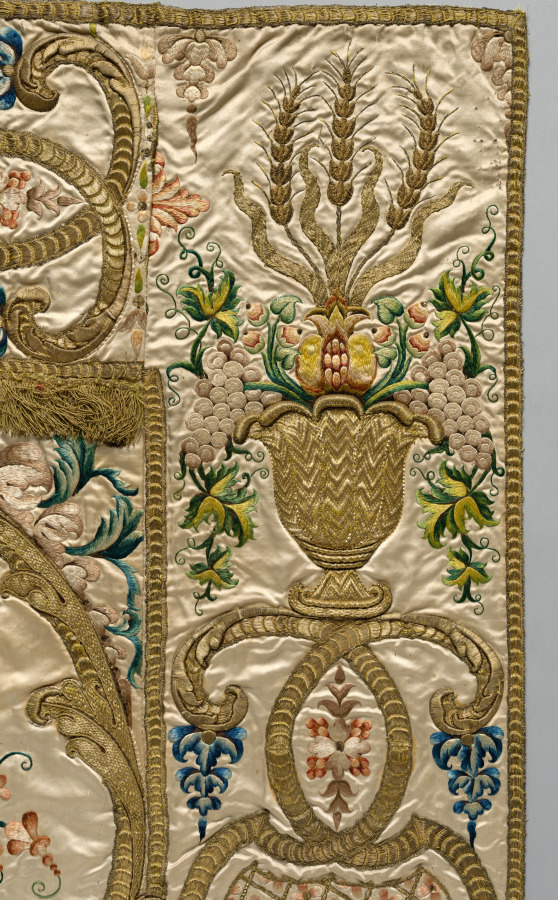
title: Embroidered Front of an Altar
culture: Italy or Spain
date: 1600s–1700s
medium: Satin and silk: embroidery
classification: Embroidery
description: This spectacular cloth with raised three-dimensional embroidery embellished the front of an altar. Lavishly applied gilt-metal thread creates architectural embellishments enhanced by grand vases displaying sheaves of wheat in the upper corners and bunches of grapes in the center of the fringed over-frontal, referring to the bread and wine of the Mass. The central coat of arms represents the Order of the Blessed Virgin Mary of Mercy, a Roman Catholic mendicant order established in 1218 by Saint Peter Nolasco in the city of Barcelona, Spain, then in the principality of Catalonia (crown of Aragon).